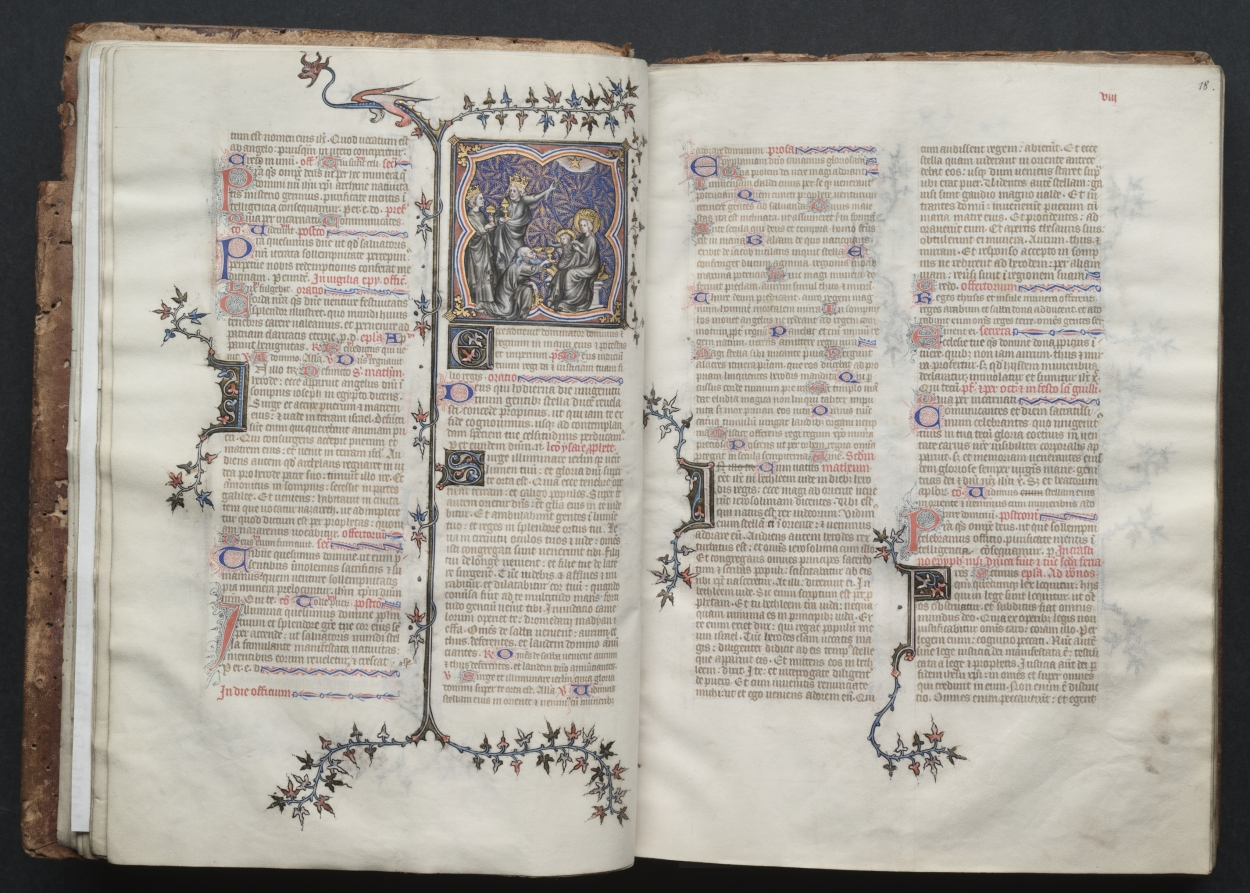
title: The Gotha Missal: Fol. 18r, Text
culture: France, Paris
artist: Master of the Boqueteaux (French)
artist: and Workshop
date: c. 1375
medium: ink, tempera, and gold on vellum; blind-tooled leather binding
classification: Bound Volume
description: The style and quality of this manuscript's decoration is typical of deluxe Parisian books made for aristocratic or royal patrons. Most of the book's decoration appears to be the work of the Master of the Boqueteaux, an artist active at the court of King Charles V (died 1380). His style was apparently shared by a number of book illuminators working in and around Paris. It is very possible that the Gotha Missal belonged to Charles V, but is not provable because the manuscript has no royal portraits and lacks a colophon. Given the book's magnificent decoration, however, it would seem that it was produced for a Valois prince, if not for the king himself. The manuscript receives its name from the German dukes of Gotha, its later owners.